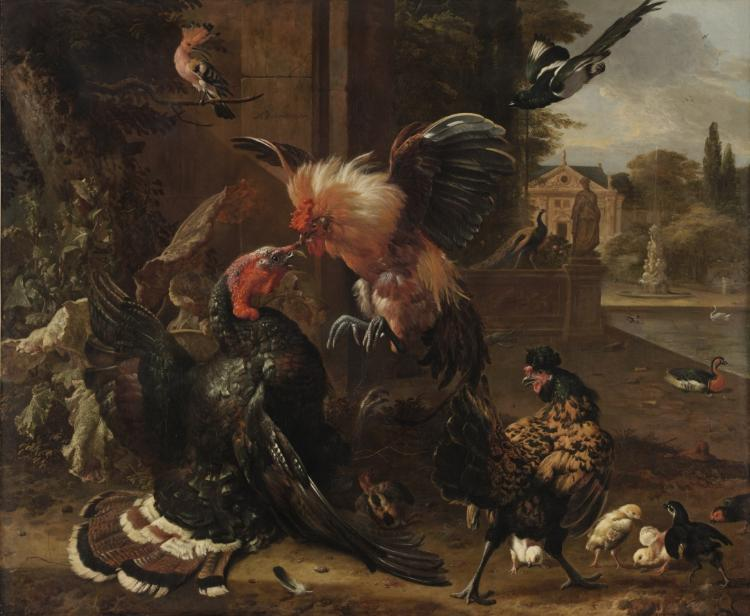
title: A Rooster and Turkey Fighting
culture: Netherlands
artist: Melchior de Hondecoeter (Dutch, 1636–1695)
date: c. 1680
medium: oil on canvas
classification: Painting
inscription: signed upper center: M C Hondecoeter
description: One of the most fashionable artists of his time, Hondecoeter specialized in paintings of domestic and exotic birds, and other animals. Here the composition is enlivened by the swirl and excitement of the fighting rooster and turkey, set in a garden with classical architecture. A large picture like this must have been placed high over a fireplace in a rich Amsterdam house.